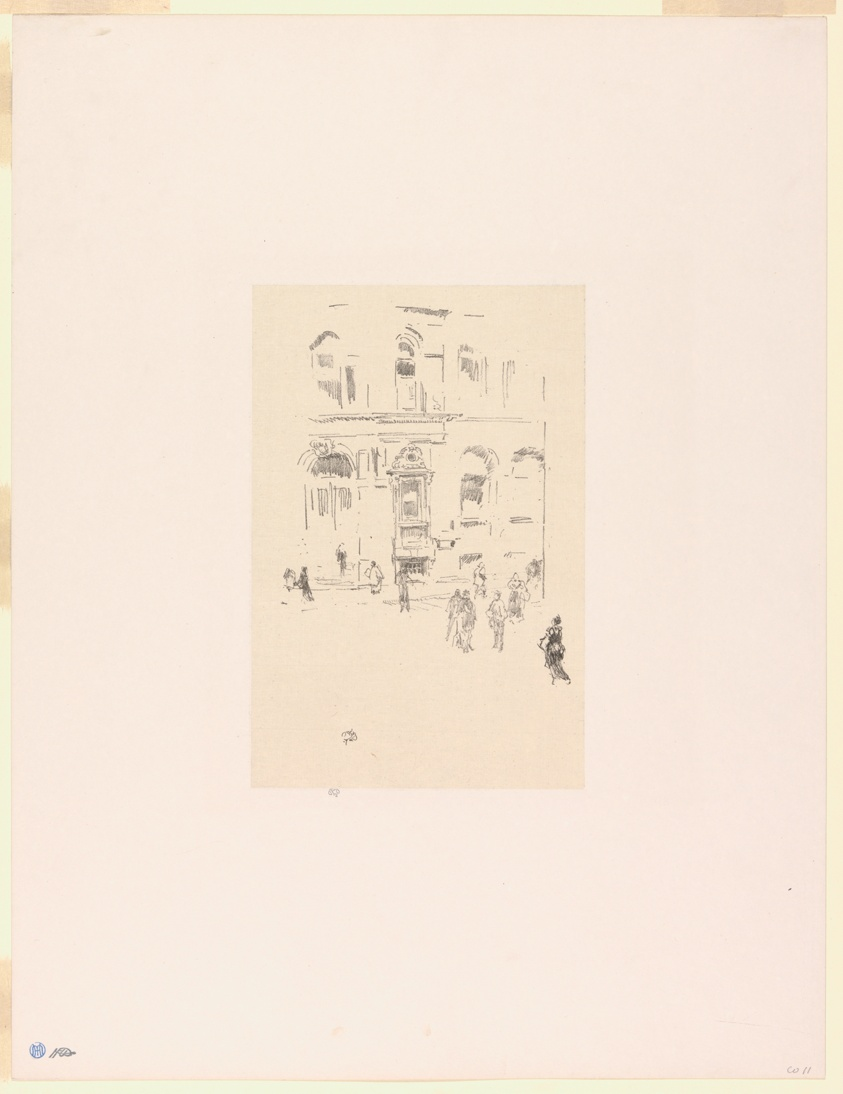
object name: Print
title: Victoria Club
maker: James McNeill Whistler (American, 1834-1903)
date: 1879, published 1887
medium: Transfer lithograph in black with scraping, on cream chine laid down on off-white plate paper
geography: United States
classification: transfer lithograph; lithograph; print; prints and drawing; paper